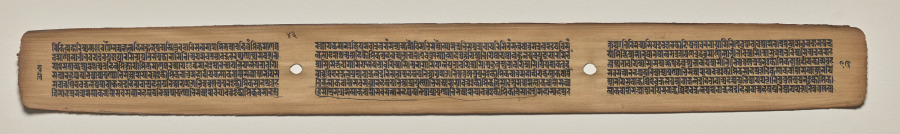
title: Text, folio 43 (verso), from a Manuscript of the Perfection of Wisdom in Eight Thousand Lines (Ashtasahasrika Prajnaparamita-sutra)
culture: Eastern India, Bihar, Vikramashila Monastery. Painting: Nepal, Kathmandu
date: Sunday, September 14, 1119 (year 239 of the Newar Samvat in the month of Ashvina)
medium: gum tempera and ink on palm leaves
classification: Painting